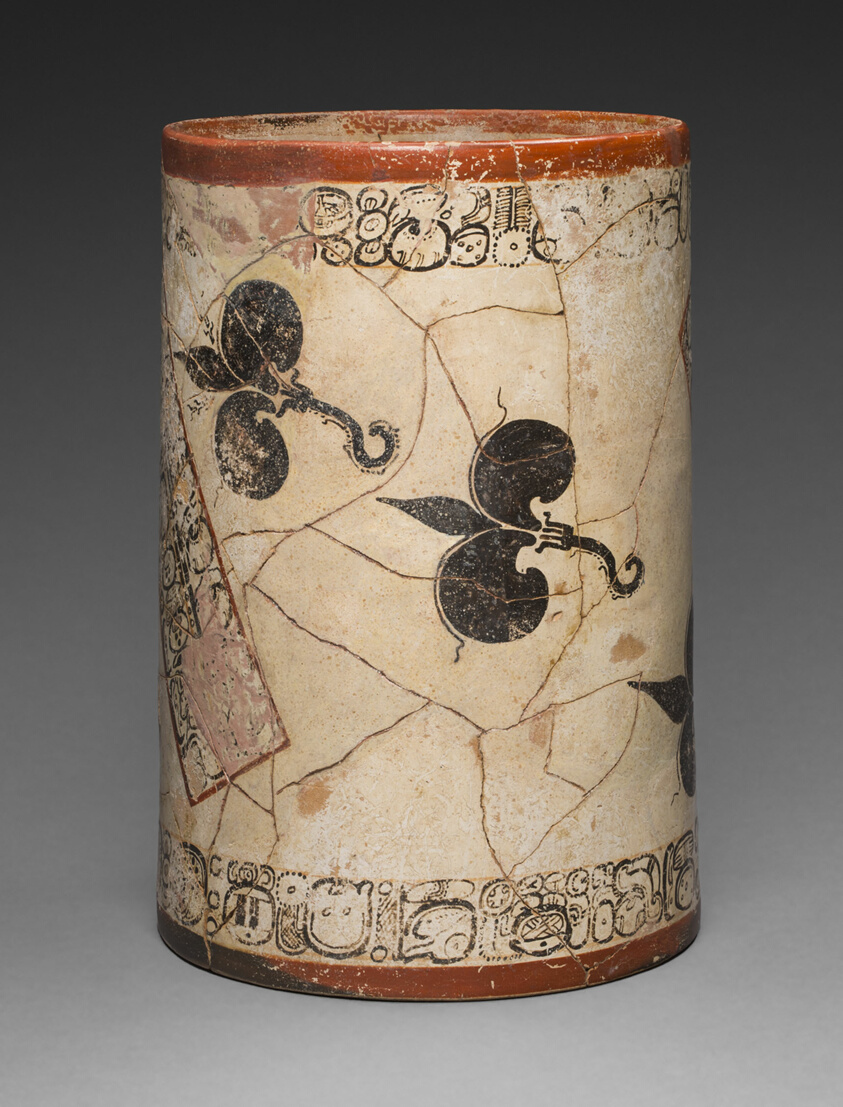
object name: Vessel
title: Water-Lily Vessel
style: maya, classic, mesoamerican, Pre-Columbian, americas, mayan, late classic, Arts of the Americas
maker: Ah Maxam; Maya, active mid-/late 8th century; Vicinity of Naranjo, Petén region, Guatemala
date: 750–800 CE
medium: Ceramic and pigment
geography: Petén department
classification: ceramics; earthenware; vessel; art of the americas; vessel for serving drinks; inscription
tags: waterlilly, artists, flowers, geneology, parents, underworld, underwater